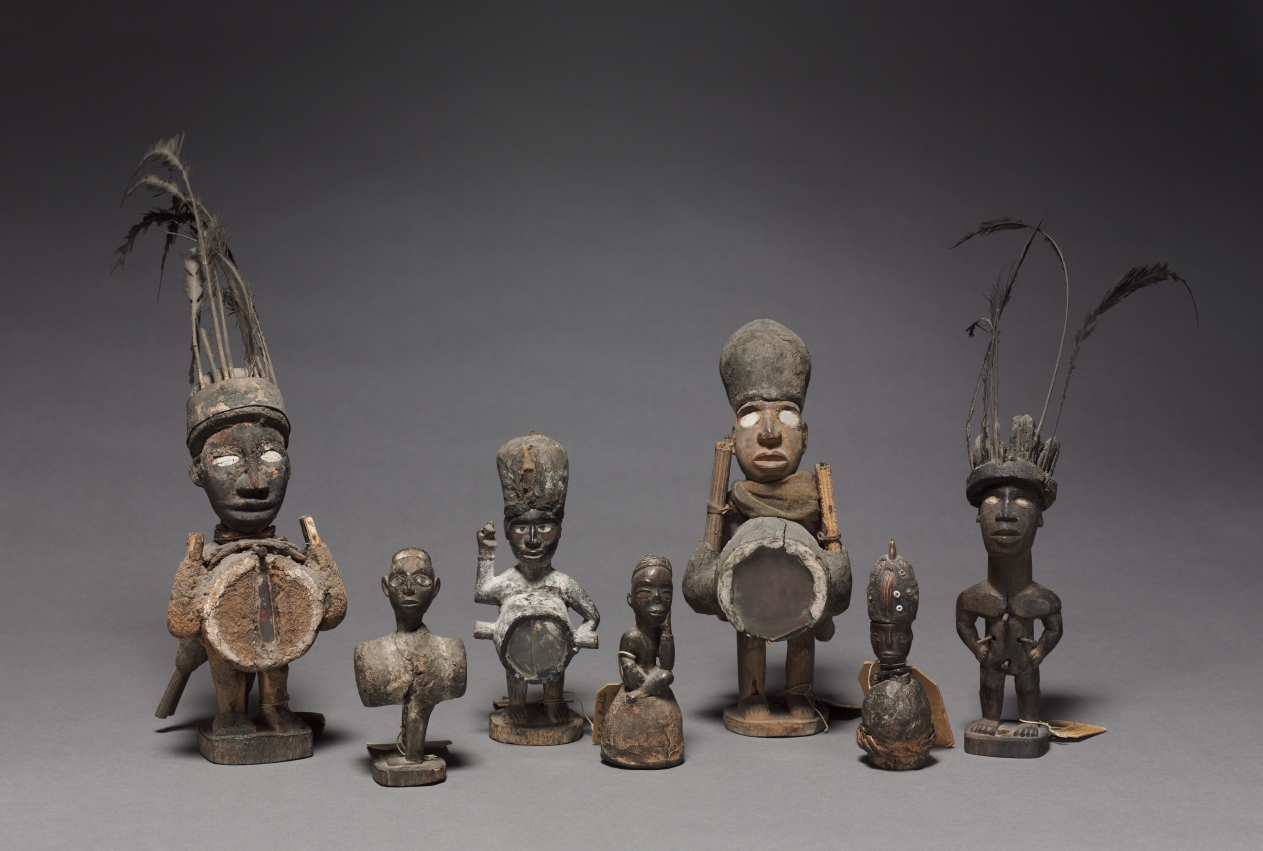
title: Power figure (nkisi)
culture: Africa, Central Africa, Republic of the Congo, Kongo-style maker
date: late 1800s-early 1900s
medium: Wood, organic materials (including resin), cloth, glass, and various other materials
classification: Sculpture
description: One of seven anthropomorphic figurines, these minkisi contained medicines in which an ancestral spirit was believed to reside. The medicines served a metaphorical rather than literal purpose in the resolution of conflicts among Kongo people. This asymmetrical figure wears a mpu headdress of chiefs with its characteristic geometric decoration. The pose may refer to a state of mourning.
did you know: Different from other Minkisi who hold their power in their abdomen, this figure sits atop a sphere in which the active substances still reside.